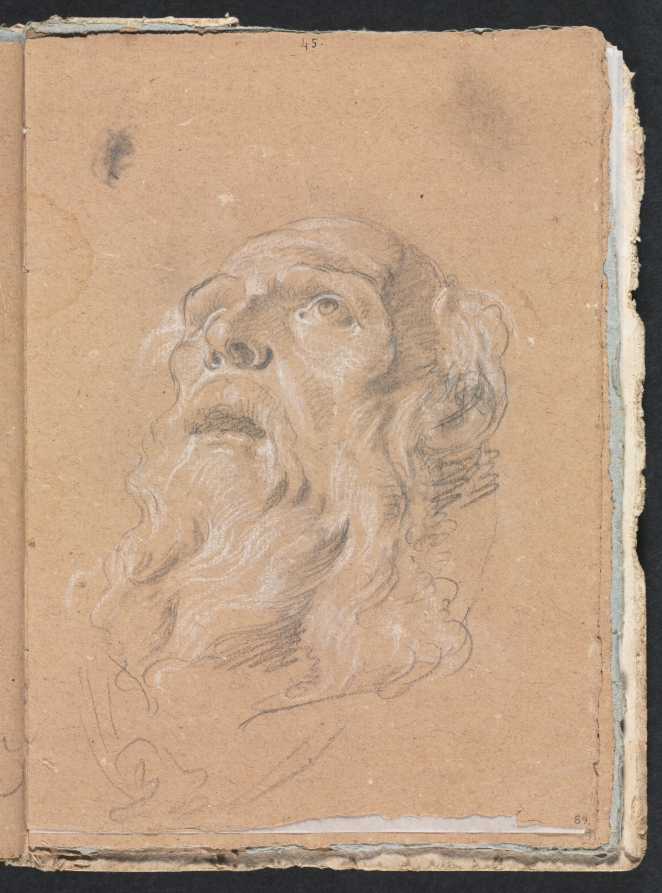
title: Verona Sketchbook: Male head (page 89)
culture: Italy, 18th century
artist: Francesco Lorenzi (Italian, 1723–1787)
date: 1760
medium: black chalk with white heightening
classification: Bound Volume